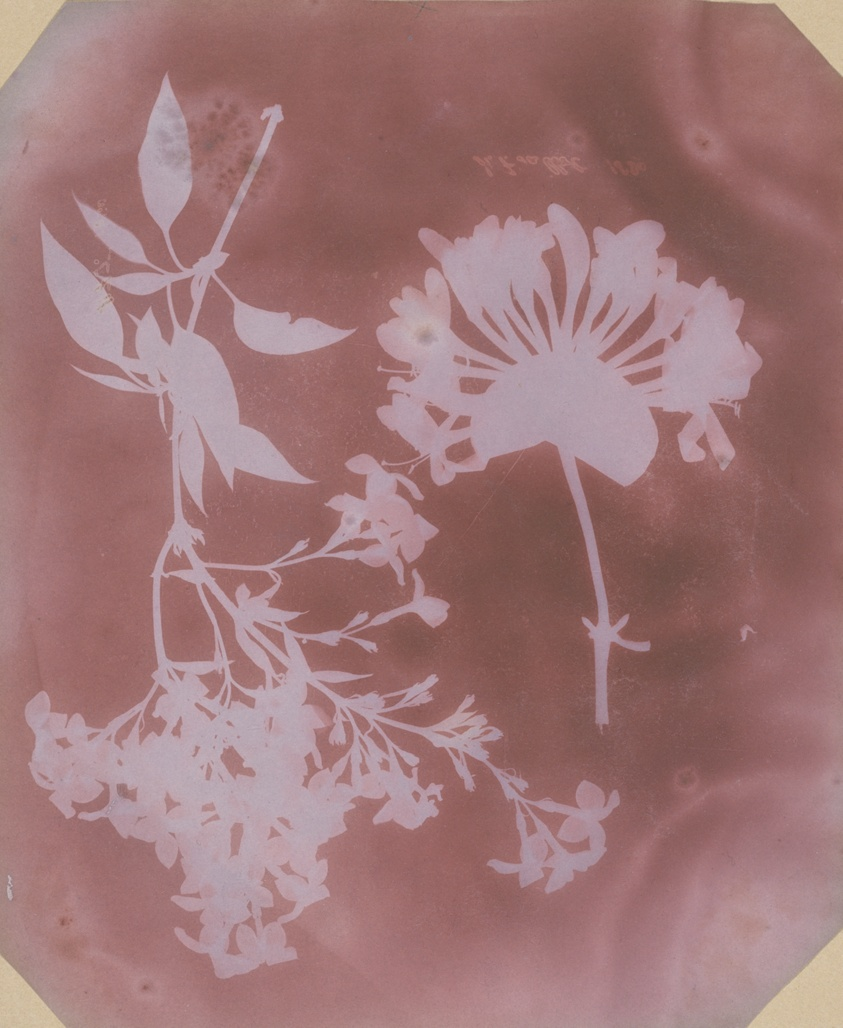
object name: Photograph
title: Two Plant Specimens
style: 19th century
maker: William Henry Fox Talbot (English, 1800–1877)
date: 1839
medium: Photogenic drawing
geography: England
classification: salted paper print; photographic process; photography; photograph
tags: flowers, plants